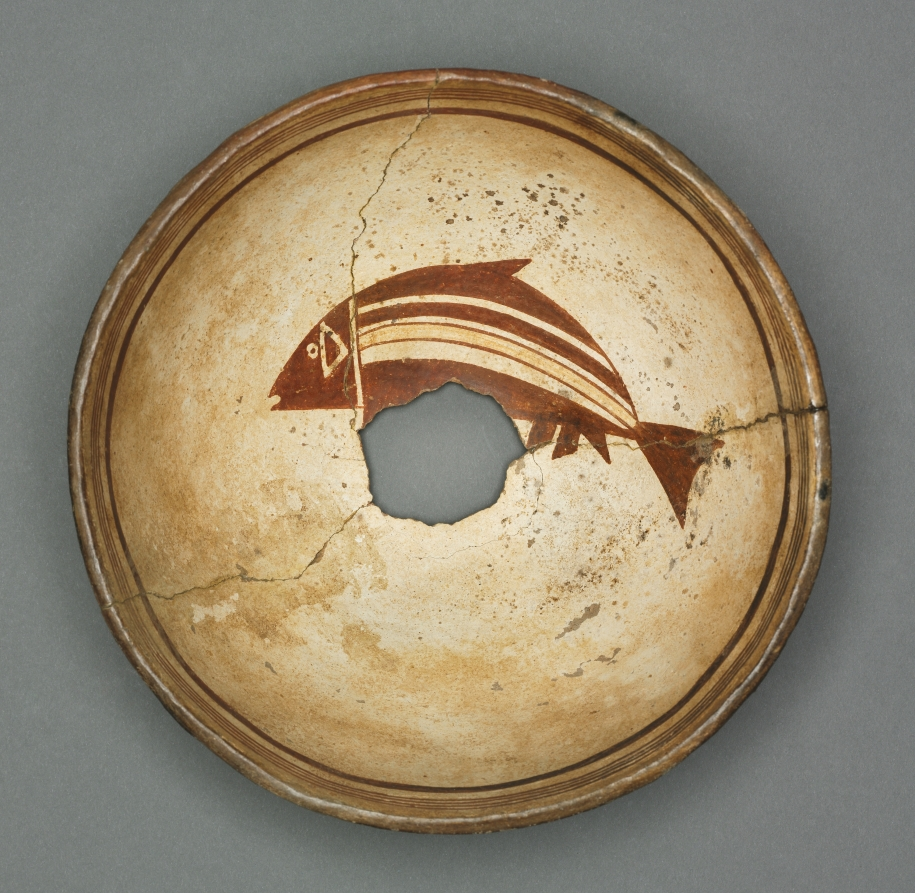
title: Bowl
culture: Southwest, New Mexico, Mimbres Valley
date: c. 1000–1200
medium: earthenware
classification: Ceramic